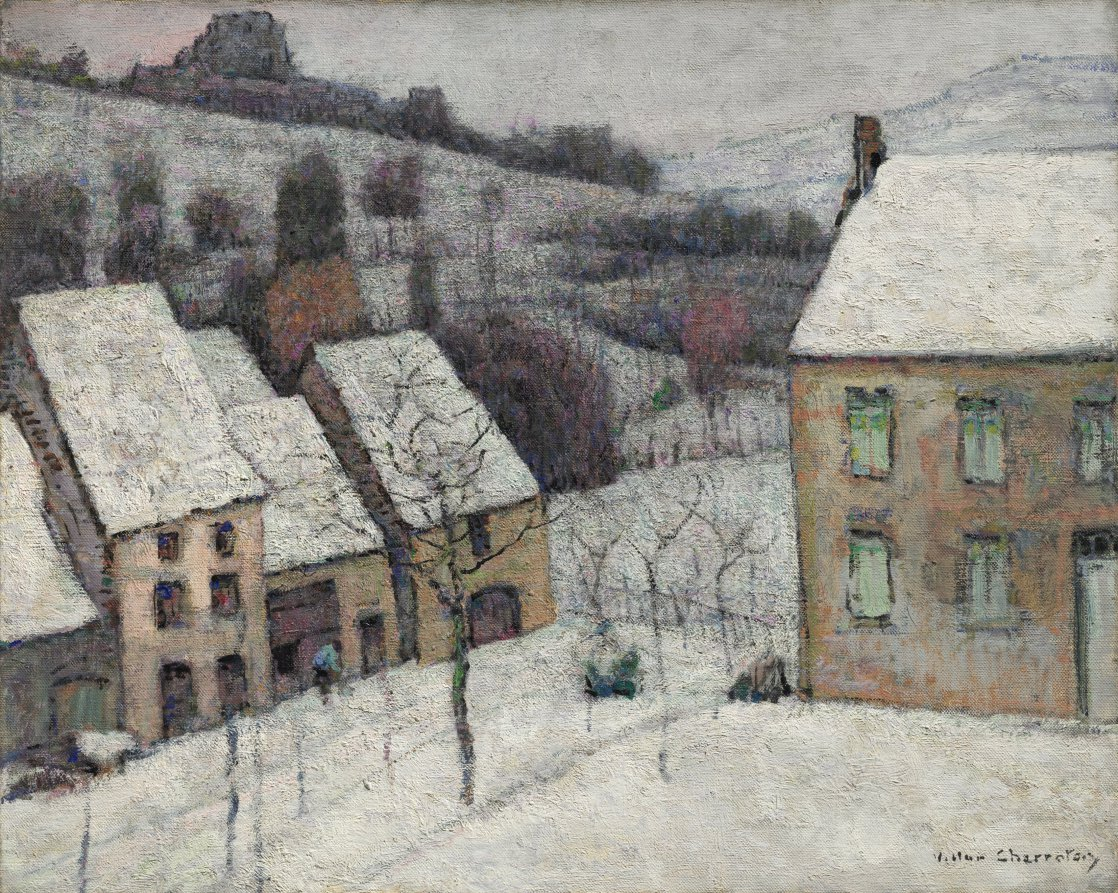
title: Murol in the Snow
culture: France, 20th century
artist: Victor Charreton (French, 1864–1936)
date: c. 1920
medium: oil on canvas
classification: Painting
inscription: Signed lower right: "Victor Charreton"